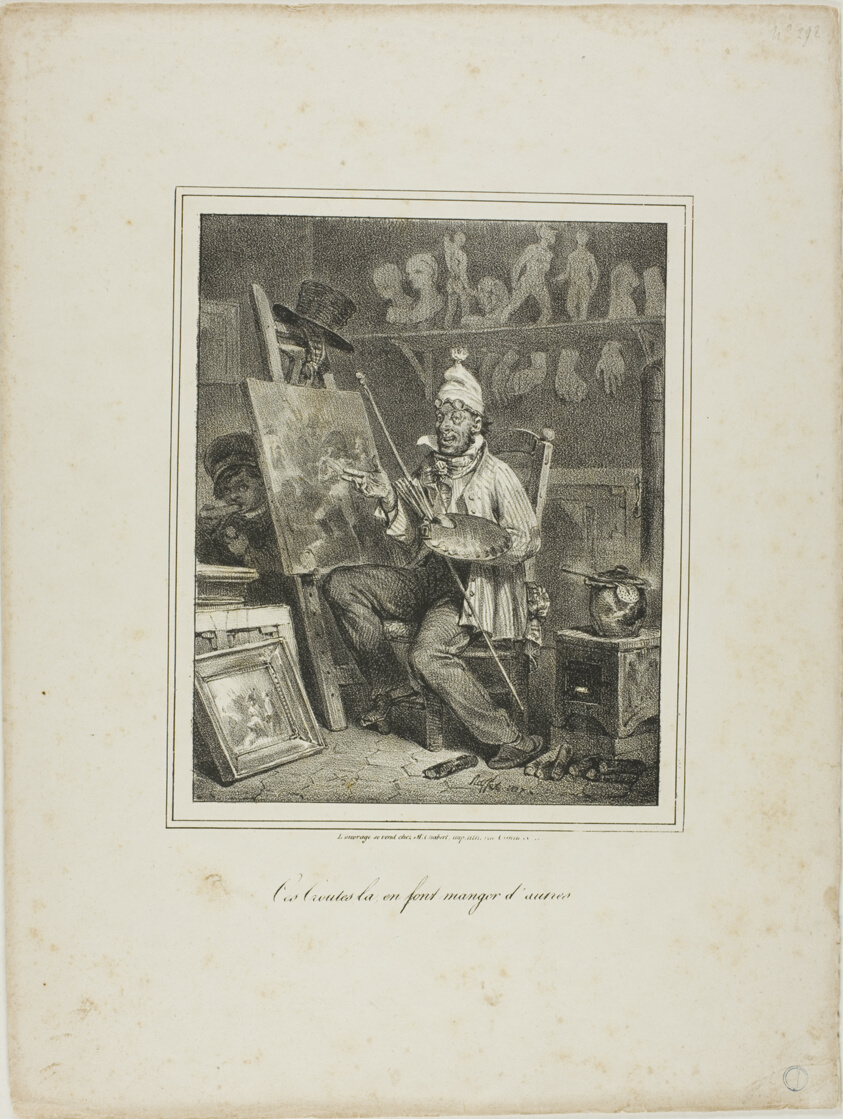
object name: Print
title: Ces Croûtes-là en Font Manger D'autres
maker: Denis Auguste Marie Raffet (French, 1804-1860); marketed by Chez M. Chabert (French, 19th century)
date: 1827–28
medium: Lithograph in black on ivory wove paper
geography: France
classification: lithograph; print; prints and drawing